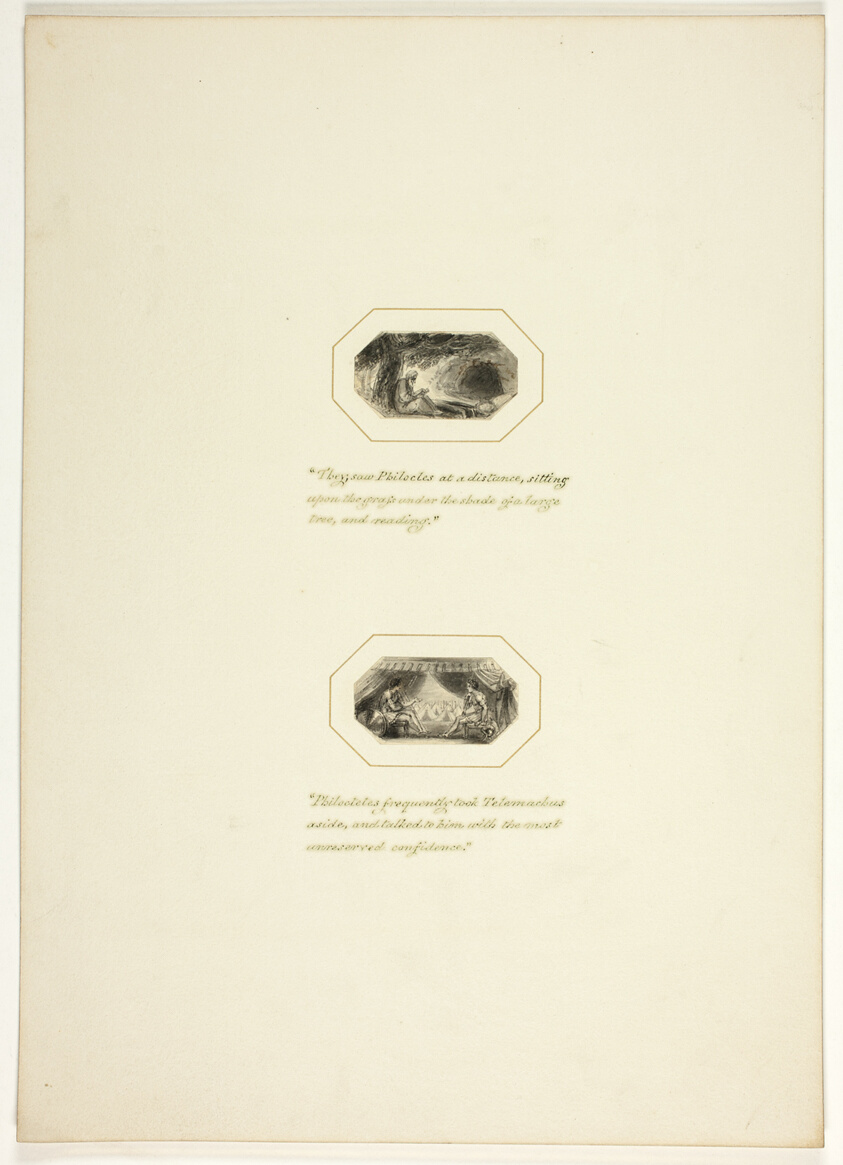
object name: Drawing and Watercolor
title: Study for a plate from Telemachus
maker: Thomas Stothard (English, 1755-1834)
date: c. 1797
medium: Ink wash on paper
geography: England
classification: ink and wash; prints and drawing; paper; drawings (visual works)